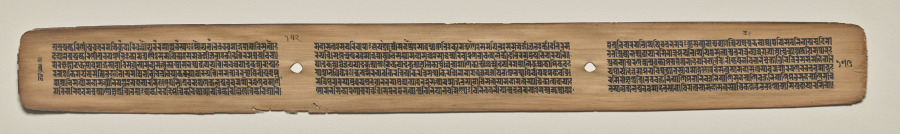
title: Text, folio 172 (verso), from a Manuscript of the Perfection of Wisdom in Eight Thousand Lines (Ashtasahasrika Prajnaparamita-sutra)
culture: Eastern India, Bihar, Vikramashila Monastery. Painting: Nepal, Kathmandu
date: Sunday, September 14, 1119 (year 239 of the Newar Samvat in the month of Ashvina)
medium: gum tempera and ink on palm leaves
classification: Painting